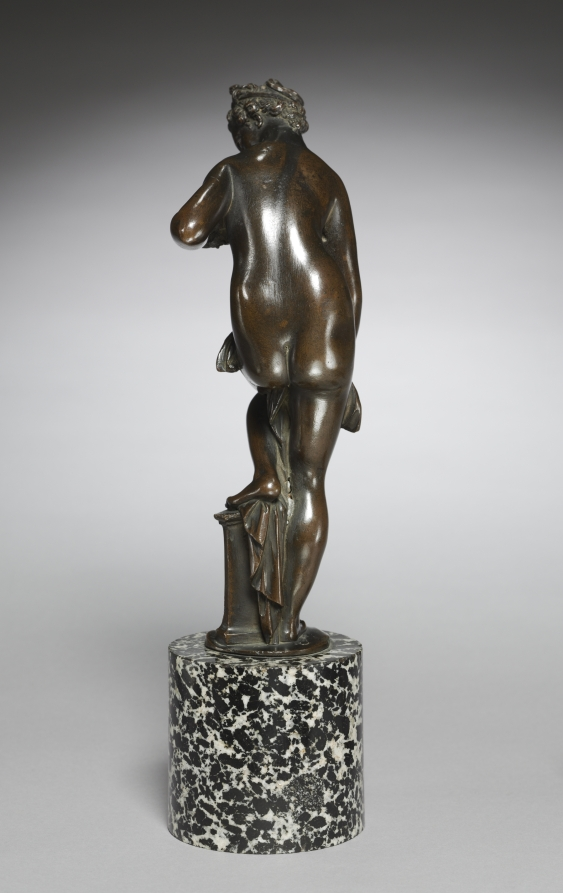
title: Venus after the Bath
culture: Italy, early 17th century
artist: cast possibly by the Workshop of Giambologna (Flemish, active Italy, 1529–1608)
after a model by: Giambologna (Flemish, active Italy, 1529–1608)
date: c. 1600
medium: bronze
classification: Sculpture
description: The statuette’s scale speaks to its likely place in private, intimate settings. The serpentine composition would have encouraged close examination from multiple angles. Compare the complexity of her pose to the relatively static Venus with a Burning Urn (1948.171).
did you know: Giambologna intended his bronze statuettes to be held and touched, to fully appreciate their smooth, elegant forms.